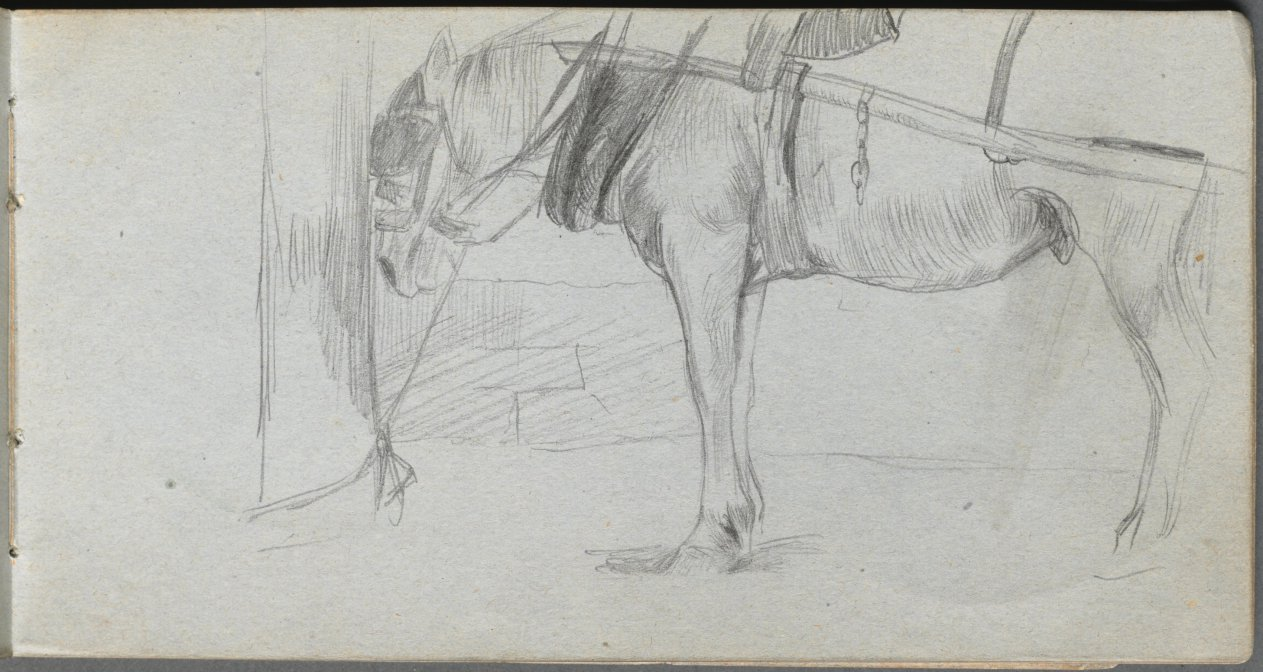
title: Sketchbook, page 6: Study of a Horse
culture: France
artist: Ernest Meissonier (French, 1815–1891)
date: c. 1860s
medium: graphite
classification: Bound Volume